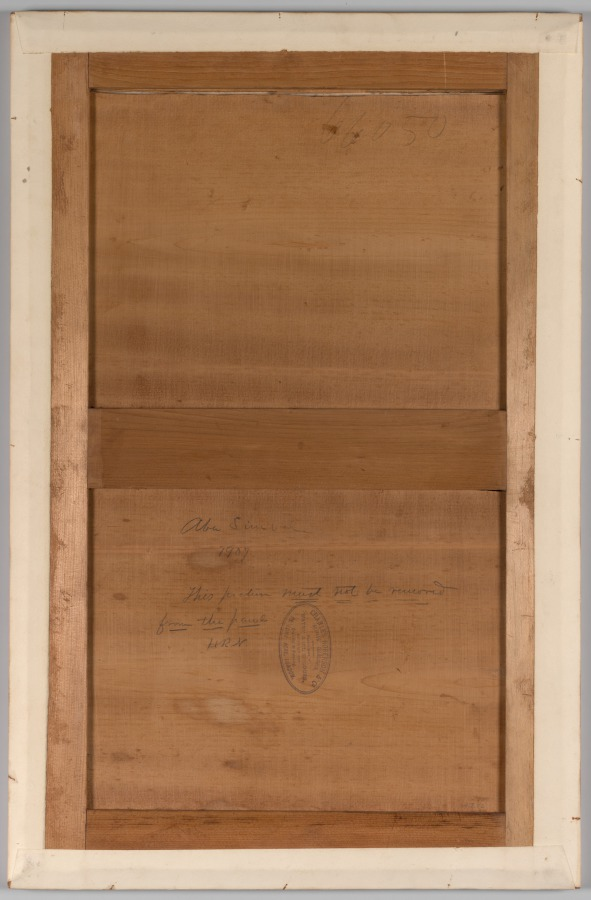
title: Abu Simbel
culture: America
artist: Henry Roderick Newman (American, 1833–1918)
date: 1907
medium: watercolor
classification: Drawing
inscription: lower left, in blue watercolor: H R Newman / Abu Simbel / Feb. 1907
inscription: verso: in graphite on wooden panel, below the horizontal support: Abu Simbel / 1907 / This picture must not (must and not underlined twice) be removed / from the panel (be removed from the panel: each word underlined once) / HRN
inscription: upper right, in graphite: 66050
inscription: purple black stamp below horizontal crossbar and just below the inscription: CHARLES ROBERSON & Co / ARTISTS’ COLOURMEN / Manufacturers of / WATER & OIL COLOURS, / MATERIALS FOR / Drawing & Painting. / 99, LONG ACRE, LONDON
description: This watercolor provides a close-up view of the Abu Simbel temples, which were buried in sand until their rediscovery in the 19th century. The American artist Henry Roderick Newman portrayed their architecture in multiple drawings between 1894 and 1913. In this later work, he meticulously layered dots and other marks to capture the tonality of sand and desert light.